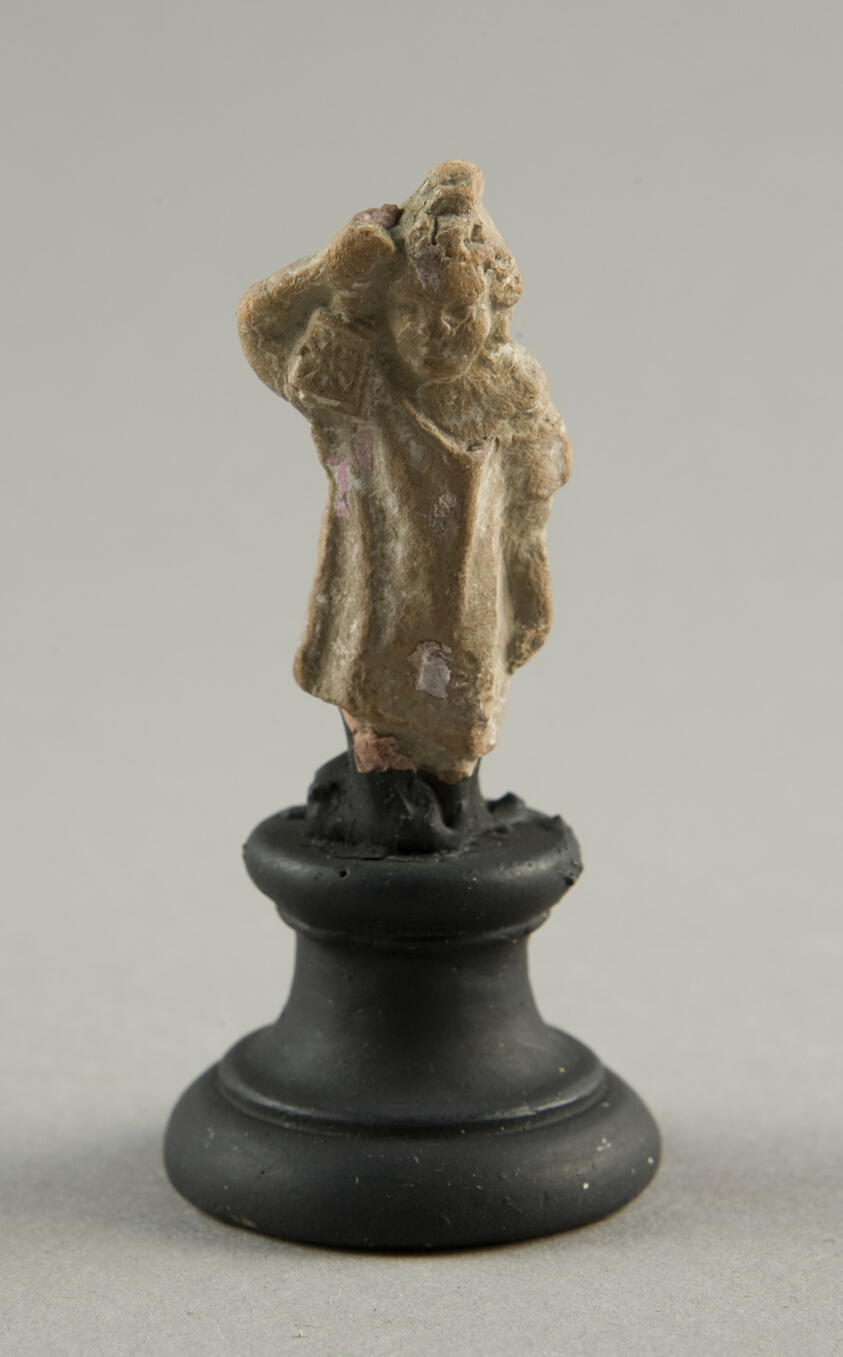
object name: Sculpture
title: Fragment of a Child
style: greek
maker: Greek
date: 3rd-1st century BCE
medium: terracotta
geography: Greece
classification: earthenware; ceramics; sculpture; ancient art